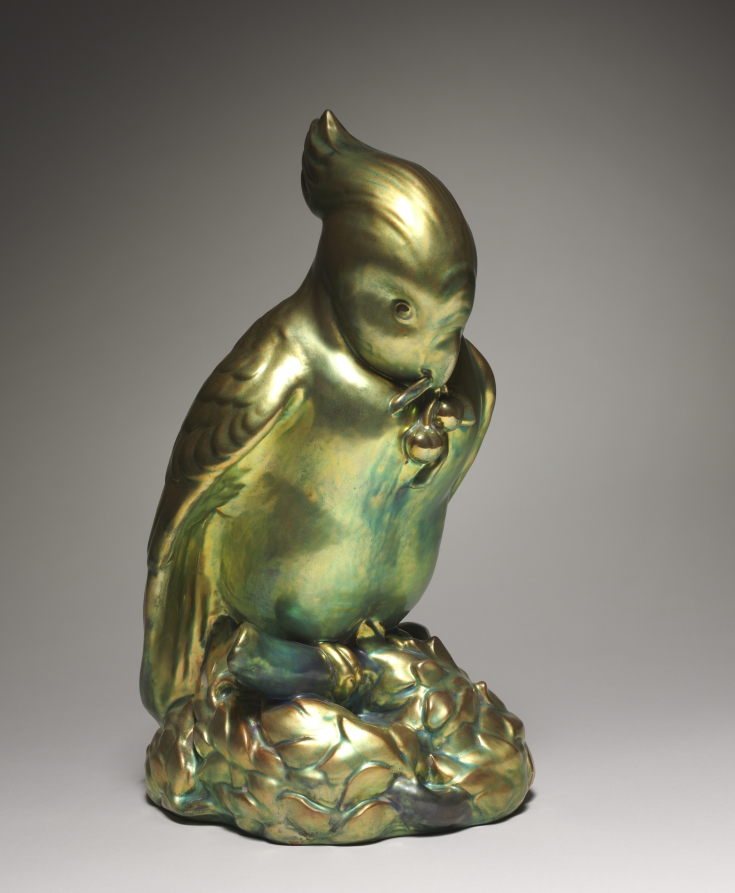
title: Parrot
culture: Hungary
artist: Zsolnay Factory (Hungarian)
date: c. 1910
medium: earthenware with lustre glazes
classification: Ceramic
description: This parrot's distinctive metallic sheen is achieved through a technique known as luster glazing, in which ground metals, typically silver, gold, or platinum, are incorporated into the glazing process. The parrot is decorated with green-gold luster, while the base is decorated with blue-purple-gold luster.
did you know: The glaze technique on this parrot is eosin, which takes its name from Eos, the Greek goddess of dawn.